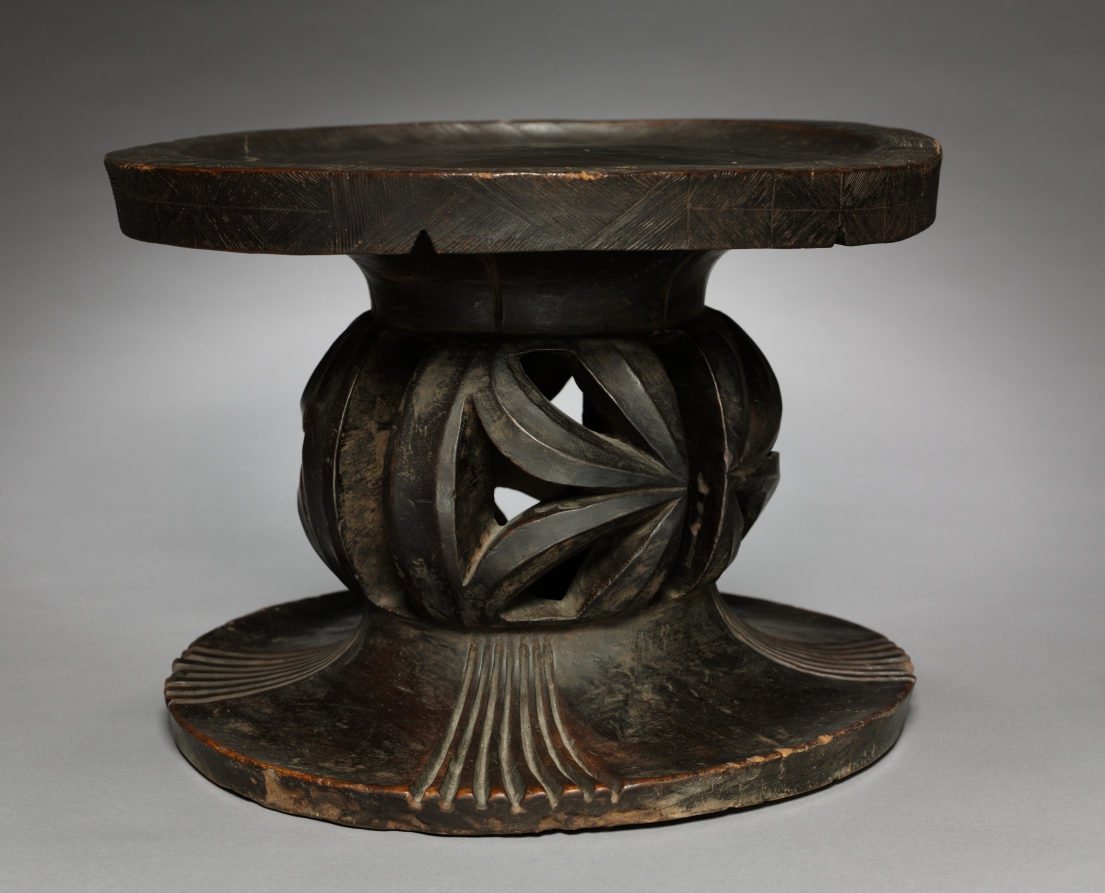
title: Stool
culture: Africa, Central Africa, Democratic Republic of the Congo, Mangbetu-style maker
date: by 1928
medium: wood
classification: Furniture and woodwork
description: Such stools were highly prized by their female owners. Sculpted by master artists with widespread reputations, they were often "signed" with a deeply cut mark on the base. This groove was then filled with red camwood as an expression of blessings and good wishes for the stool's owner.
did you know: In 1928, Paul Travis photographed the Mangbetu queen who once owned this stool as she sat on it.